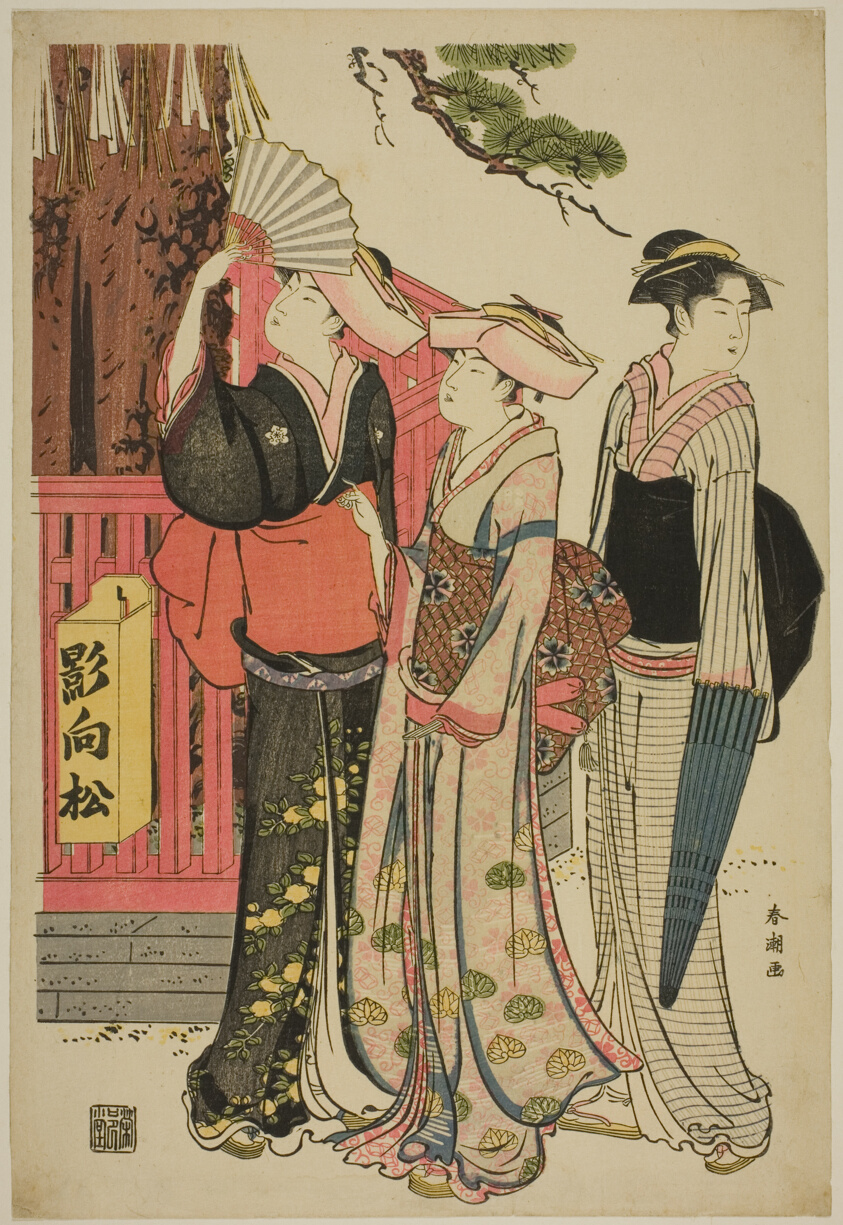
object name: Print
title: Three Women at the Base of a Sacred Pine Tree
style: Japanese (culture or style)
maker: Katsukawa Shuncho; Japanese, active c. 1780-1801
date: c. 1790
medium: Color woodblock print; oban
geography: Japan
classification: woodblock print; print; asian art